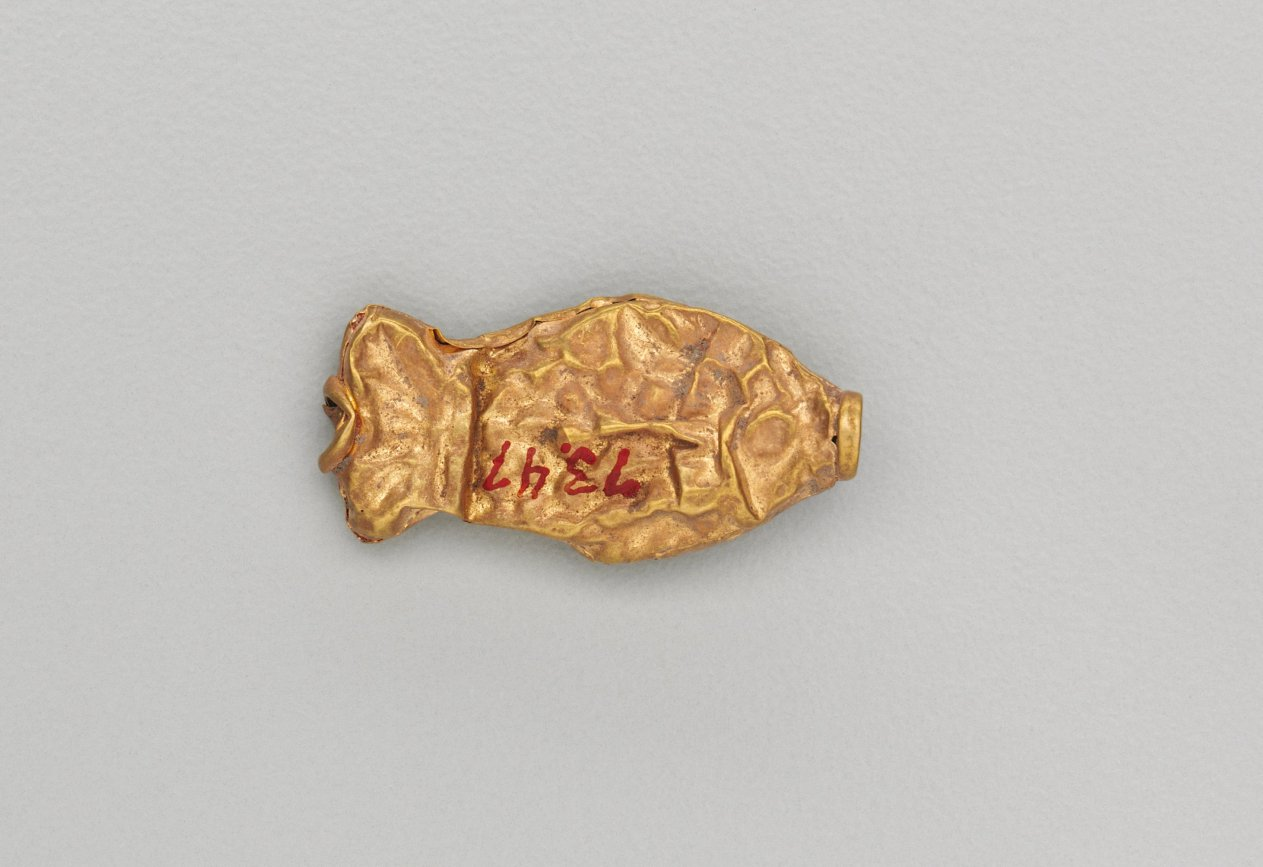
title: Necklace Bead in the Form of a Fish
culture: India, Shunga period (185–78 BCE)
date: 185–72 BCE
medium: gold repoussé with granulation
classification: Jewelry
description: Jewelry in ancient India often consisted of elements associated with water, such as fish and other aquatic plants and animals. Since water is essential for life, imagery that connotes water is life-affirming, or auspicious, and therefore appropriate adornment.